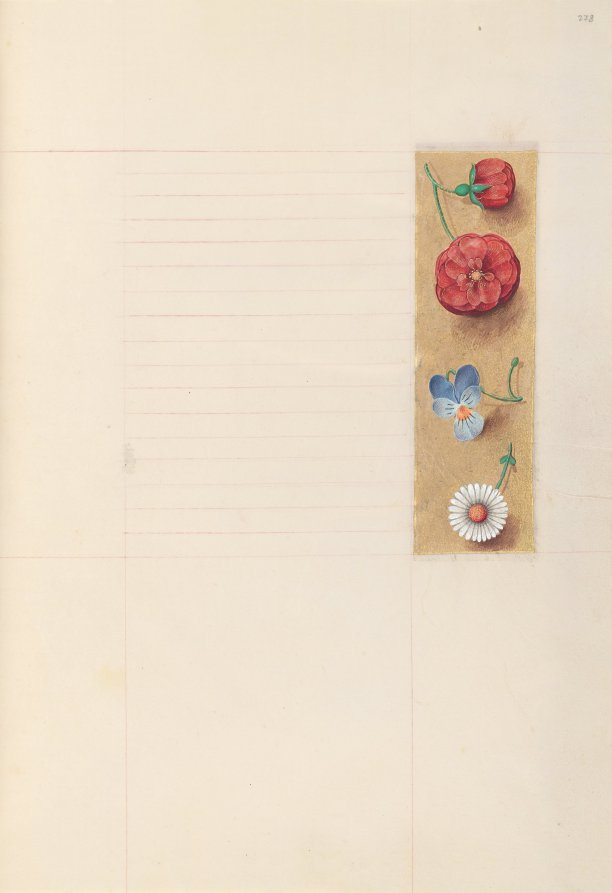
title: Hours of Queen Isabella the Catholic, Queen of Spain: Fol. 278r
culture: Flanders, Ghent and Bruges, late 15th century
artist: Master of the First Prayerbook of Maximillian (Flemish, c. 1444–1519)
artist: and Associates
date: c. 1500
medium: ink, tempera, and gold on vellum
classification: Bound Volume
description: This manuscript was illuminated by a circle of at least five highly organized manuscript painters active in the Flemish cities of Ghent and Bruges. The principal illuminator was Alexander Bening, who painted the majority of the book's miniatures. Manuscripts produced by this circle of artists are renowned for the decoration of their borders, which typically feature a rich variety of realistically-painted flowers, birds, and butterflies. This prayer book, called a book of hours, was intended not for a cleric, but for the private devotions of a lay person-in this case, Isabella the Catholic, Queen of Spain (1451-1504). Isabella's coat of arms embellishes the book's frontispiece. It is unlikely that the book was commissioned by the Queen herself; rather, she probably received it as a diplomatic gift from someone courting her patronage, perhaps Cardinal Francisco Jimenez de Cisneros. A Franciscan friar, Jimenez was dependent upon Isabella for his advancement, first to the post of Queen's confessor in 1492, and then to Archbishop of Toledo in 1495.